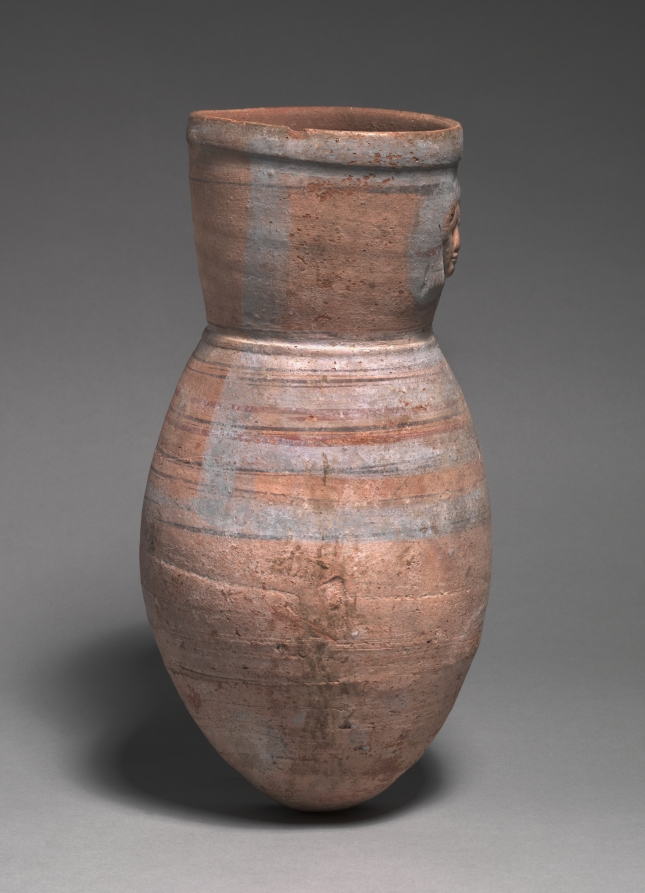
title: Hathor Jar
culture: Egypt, probably Malqata, New Kingdom (1540–1069 BCE), Dynasty 18, reign of Amenhotep III (1390–1352 BCE)–reign of Akhenaten (1351–1334 BCE)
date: 1391–1337 BCE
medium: Nile silt ware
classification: Vessels